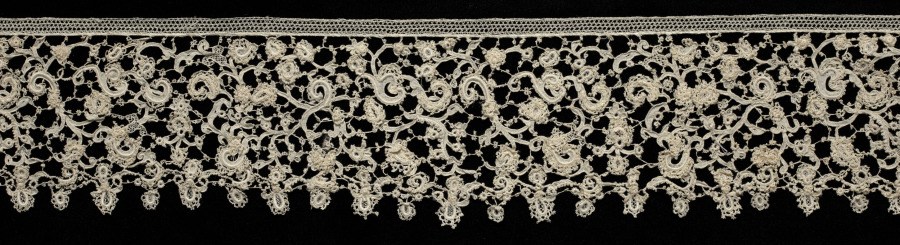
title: Lace Edging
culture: Italy, Venice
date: 1660–99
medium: Needle lace (Venetian Rose Point-Punto Rosallino)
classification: Lace